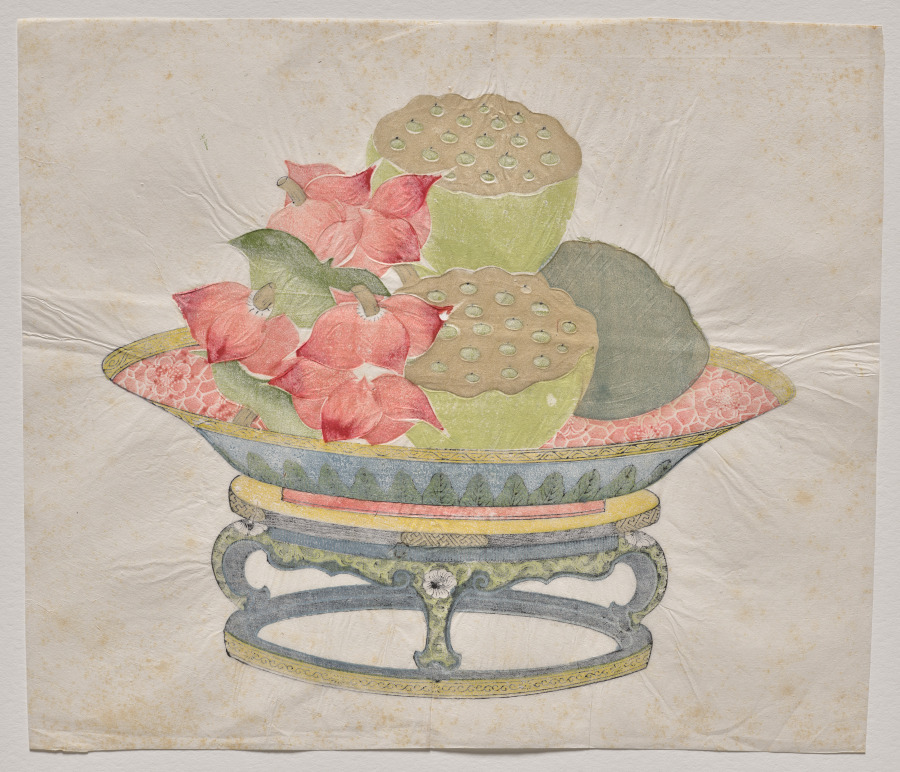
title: Lotus Seeds and Water Caltrops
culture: China, Suzhou, Qing dynasty (1644–1911)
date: 1700–1750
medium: Polychrome woodblock print; ink and color on paper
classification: Print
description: In the 1600s, printing flourished in such Jiangnan cities as Nanjing, Suzhou, Hangzhou, and Huizhou, evolving from privately enjoyed illustrated books printed in color to more commercialized single-sheet color prints that were hung on walls and became part of the rich urban visual culture.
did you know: Woodblock printing in color reached a height in China in the 1600s to 1700s. The prints were executed by means of sets of separate blocks, each carved to print a different color.